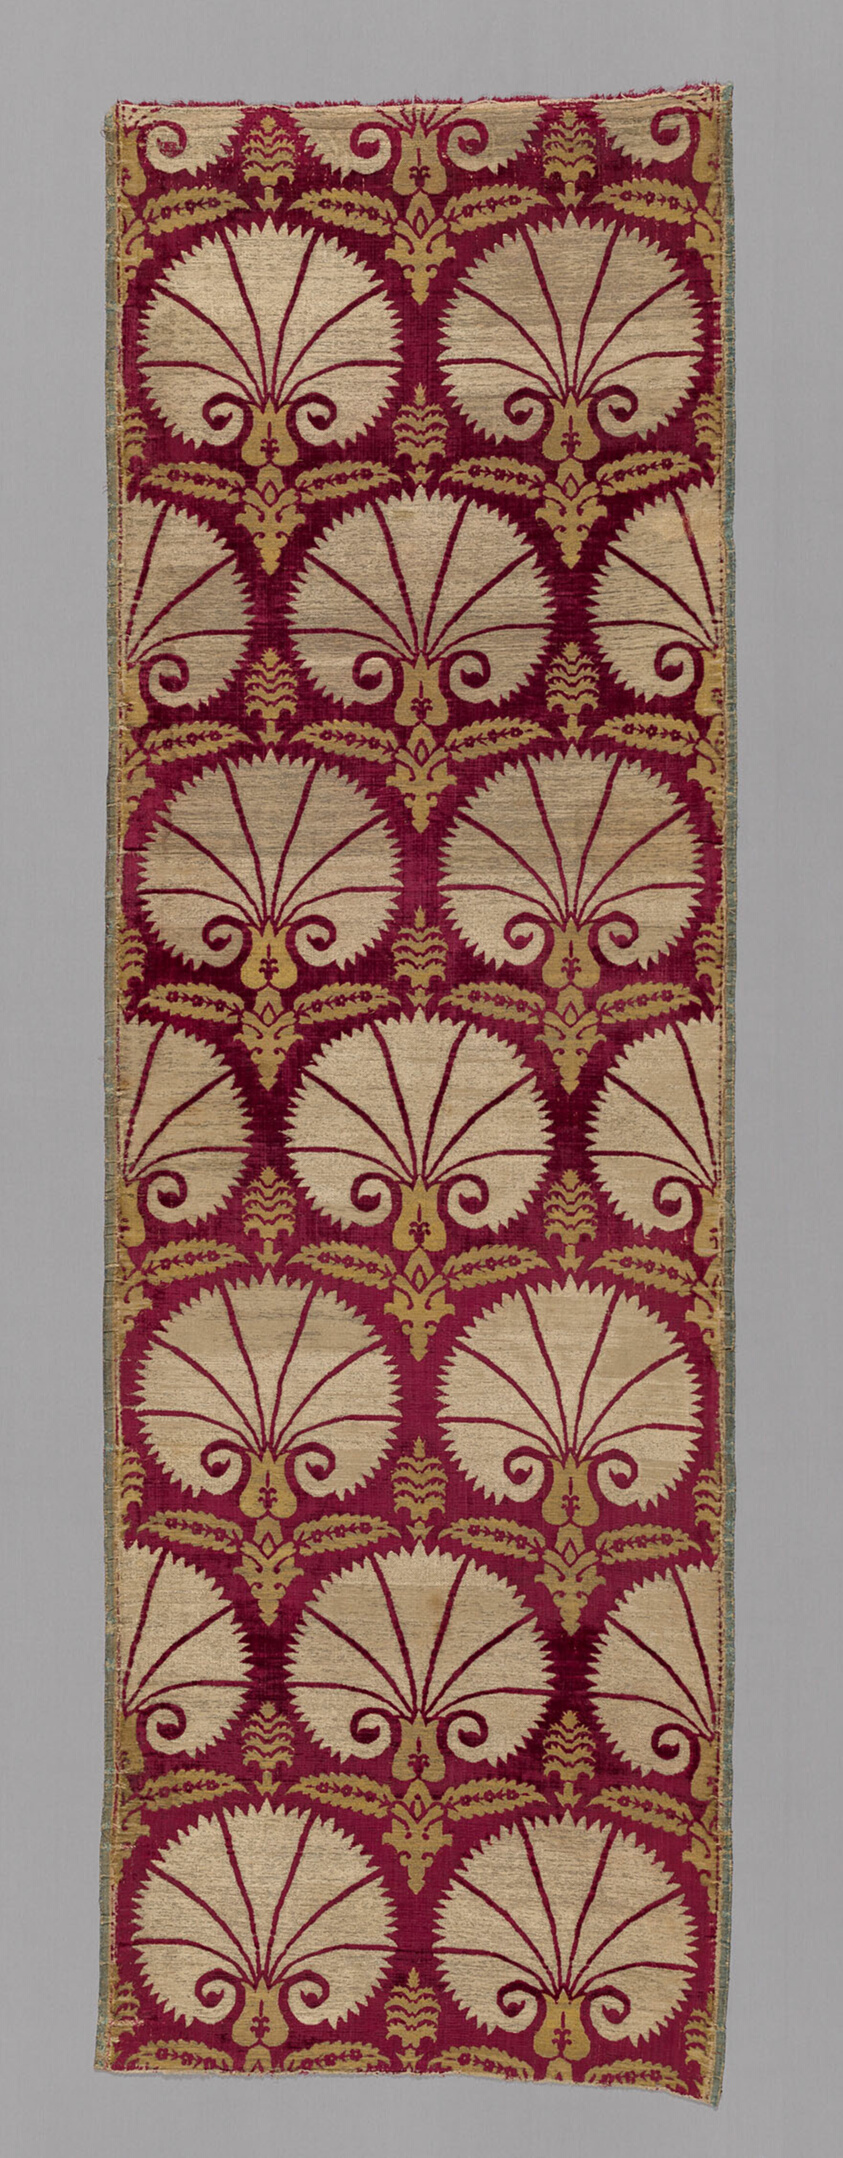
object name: Textile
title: Panel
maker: Turkey, Bursa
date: 1601/25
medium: Silk, cotton, gilt-metal-strip-wrapped silk, satin weave with brocading wefts; cut voided velvet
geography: Turkey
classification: textile; weaving - velvet